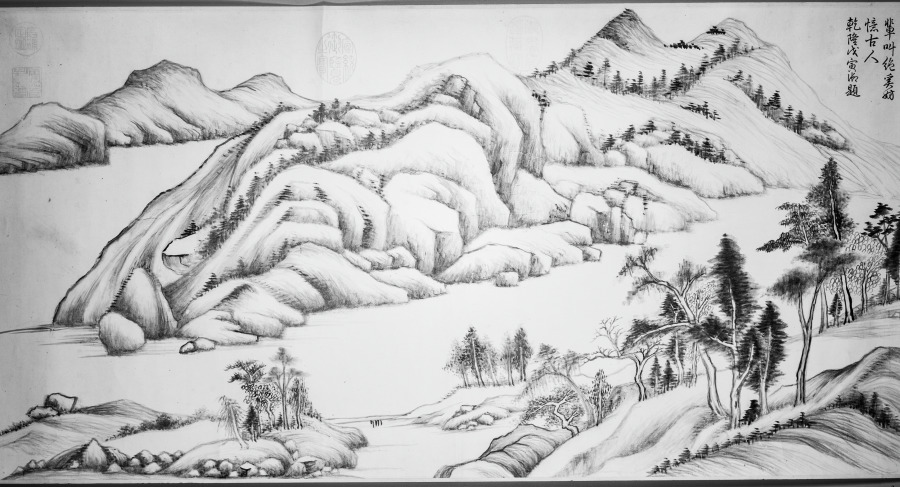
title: River and Mountains on a Clear Autumn Day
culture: China, Ming dynasty (1368–1644)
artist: Dong Qichang (Chinese, 1555–1636)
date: c. 1624–27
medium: Handscroll; ink on Korean paper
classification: Painting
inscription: 黃子久江山秋霽似此，當恨古人不見我也。思翁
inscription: 董文敏每遇高麗鏡面箋，書畫尤為入神。此卷改表紙用之，字跡隱然，兼有朝鮮之印。至於筆法圓秀，真接倪黃。豈文沈所可同日而語也。 康熙庚午中秋後一日，天氣澄爽，重裝初畢，跋於瓶廬。抱瓮翁高士奇。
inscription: Second inscription by Gao Shiqi 高士奇 (1645–1704): On the twenty-third day of the ninth month, the jiaxu year of the Kangxi era [1694], I packed my bags to head north. When my boat passed Wuchang [Suzhou], Mr. Mantang [Song Luo] brought wine to bid me farewell so that we could share our thoughts on our separation in the last few years. I showed him the paintings and calligraphy which I collected and asked his opinions. Since Mr. Mantang does not own any handscrolls by Wenmin [Dong Qichang], I leave this one for him in commemoration of our parting; thus the painting will have a worthy owner and our meeting will become a beautiful story in the future. It is the fourth day after the beginning of winter, with the sky clear and sober. Trees under frost have turned red and yellow, seemingly echoing the brush and ink in the painting. I also ask Mr. Mantang to inscribe a poem to commemorate our meeting so that it will survive forever.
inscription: 1 colophon and 4 seals of Song Luo 宋犖 (1634–1713): Who is the foremost art connoisseur of our dynasty?/ Tangcun [Liang Qingbiao, 1620–1691] is dead, so the title passes to Jiangcun [Gao Shiqi]./ Leaving office, you retired for five years in the Lake region./ Fondling handscrolls and hanging scrolls from morning to evening./ You sent me your collection catalogue Xiao Xia Lu last year;/ It is indeed the true equal of [Zhou Mi's] Yun Yan Guo Yan./ This year you returned to the capital by imperial order;/ Your boat with calligraphy and paintings anchored at the river bank in Suzhou./ When we met each other you did not waste any time for conversation by poured out immediately/ From your "coral net" extraordinary treasures./ You produced incomparable scrolls, with gold-inscribed labels and jade rollers,/ Pouring out from bags and trunks, they were spread in disarray./ Without a word, I rolled and unrolled until my fingers were numbed,/ We sat straight, facing each other quietly, and never felt tired./ For three days we forgot about sleeping and food./ And at times we shouted our joy out loud, forgetting who is host or guest./ Your Dwelling in the Fuchun Mountains and the Yuansheng manuscript/ These peerless works I myself examined with delight./ As an added pleasure to the farewell dinner under the Maple Bridge,/ You allowed me to hold again this handscroll by Dong Qichang--/ The Misty River and Piled Peaks [by Zhao Mengfu] and this Clear Autumn Day are two extraordinary masterpieces./ In showing such life and spirit with "qi yun." the artists were truly "men of heaven."/ The Clear Autumn Day is not even three feet long,/ Painted on tributary Korean paper, it shines like silver./ Every building up and every turn of the mountains imitates nature,/ Every tree and every rock is removed from the commonplace./ From the beginning, the theory of poetry is the theory of painting,/ Like the lotus and the morning sunshine, they complement and refresh each other./ The artist's inscription regrets that "the Old Masters cannot see my scroll."/ Huang Gongwang would have agreed in his grave./ The vermilion of the seals glitter and dazzles the eyes,/ These added accessories are as valuable as jade./ You are very kind to give it to me,/ The feelings expressed in your inscription are so sincere./ Wanting to refuse, but unable, I accept it to respect your wish,/ And taking off my gown and cap I wrapped it with care./ You asked me to write a long poem in commemoration of this beautiful occasion,/ I am too ashamed that my effort in response is so poor and inadequate./ Returning home, I unrolled it under candlelight, trying to write the colophon,/ The light of the waning moon shines at the foot of the mossy wall./ Earnestly humming and brows knit in deep thought, I try to compose;/ The verses are not outstanding, but the facts are real./ With this poem recorded at the end of the scroll, I mail it to you for approval,/ This poem and this painting shall outlast a thousand springs. (Translation by LYSL/HK/WKH)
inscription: 1 colophon and 2 seals of Shao Changheng 邵長蘅 (1637–1704); 2 inscriptions and 14 seals of the Qianlong 乾隆 emperor (r. 1736–95); 1 seal of the Jiaqing 嘉慶 emperor (r. 1796–1820); 3 seals of the Xuantong 宣統 emperor (r. 1908–11); 1 seal unidentified.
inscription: [印] 朝鮮國王之印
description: Dong Qichang had a tremendous impact on the artistic practices and historiography of later generations; his works and writings shaped literati aesthetics. Here, Dong places an abstract landscape composition diagonally across the picture plane, configured to recall earlier masters and simultaneously express his own personal style. Dong’s inscription claims, Huang Gongwang’s Autumn Day, looks like this. I truly regret the master has not seen my work. In fact, Dong Qichang may have had Dong Yuan’s Xiao and Xiang Rivers in mind, a work he owned and considered a key work in Chinese art history.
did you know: The painting has an imprint of a Korean seal that reads "Seal of the king of Joseon."